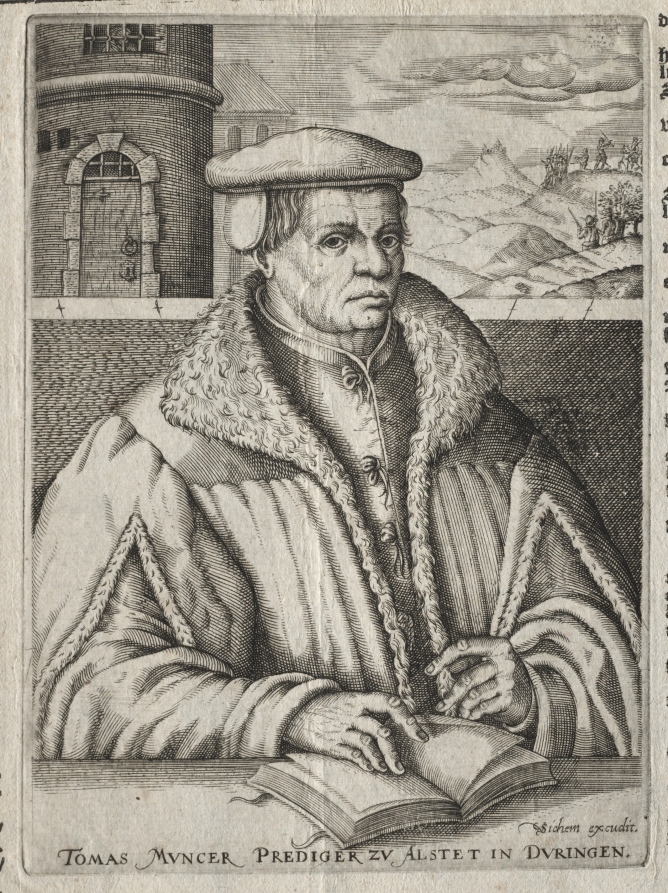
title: Portrait of Thomas Münzer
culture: Netherlands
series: Iconica et historica discripto...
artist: Christoffel van Sichem (Dutch, 1577–1658)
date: 1609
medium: engraving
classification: Print